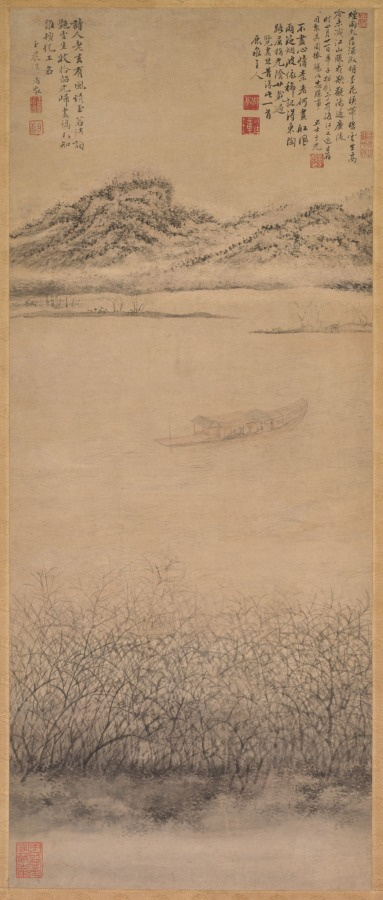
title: The Crossing of the Yangzi River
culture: China, Qing dynasty (1644-1911)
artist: Shang Rui (Chinese, 1634?-)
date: c. 1700–1720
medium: hanging scroll, ink and slight color on paper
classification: Painting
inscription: Colophons: One upper left inscription by the artist followed by two seals; one upper right inscription followed by two seals; three other seals, one in lower left